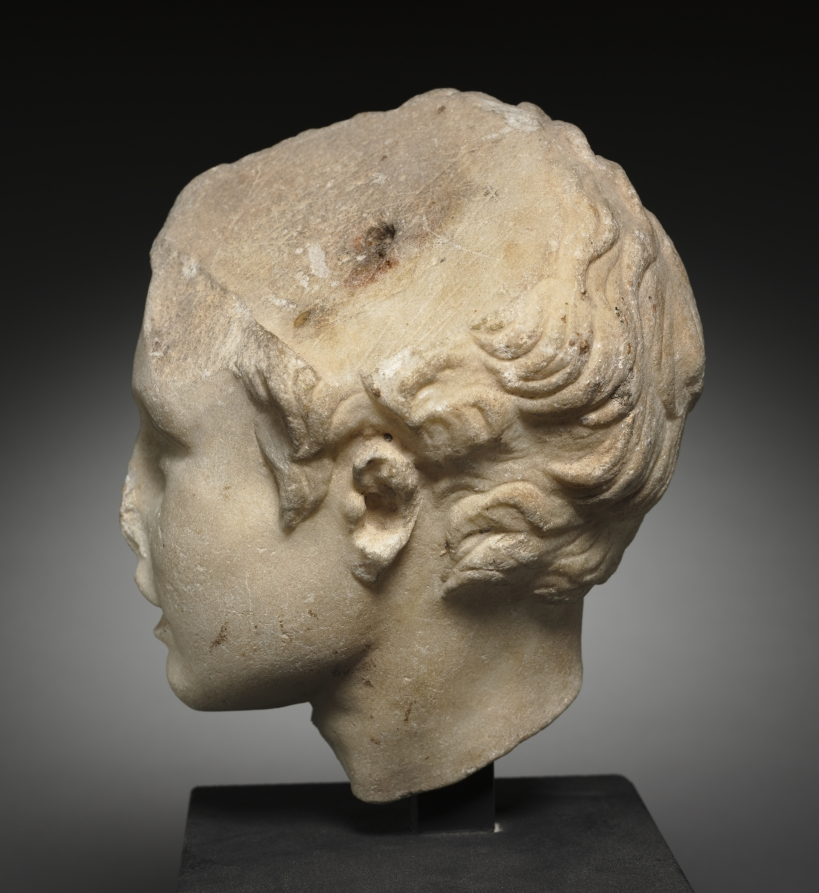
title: Eros, the God of Love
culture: Italy, Roman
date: 1–100 CE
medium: marble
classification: Sculpture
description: This is a Roman copy of the statue of Eros by Lysippus, the last of the great sculptors of Greece. He worked in the second half of the fourth century and was court sculptor to Alexander the Great. In the complete statue the god stood naked, his head turned to the right, his hand clasping a bow.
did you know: The oldest versions of Greek myth describe Eros, god of love and desire, as one of the first beings in existence.